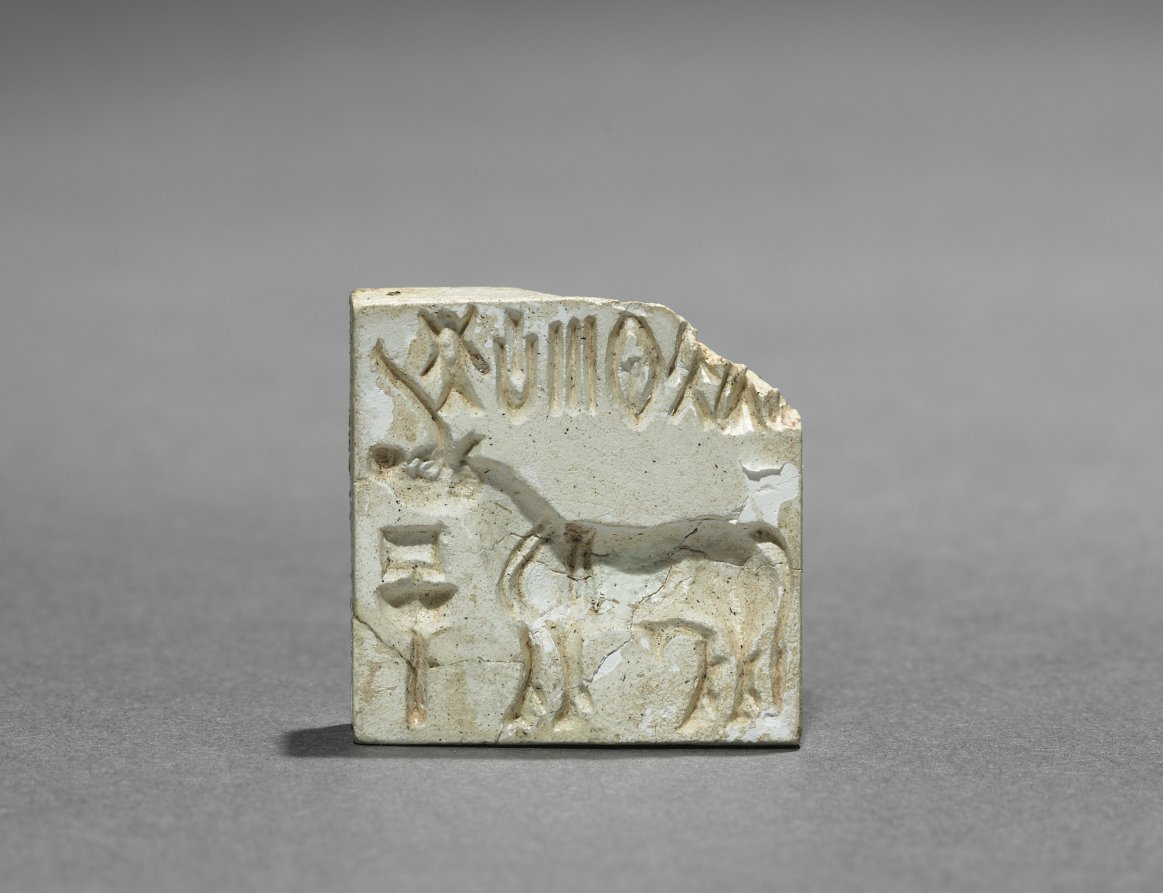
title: Seal with Unicorn and Inscription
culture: Pakistan, Indus Valley civilization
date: c. 2000 BCE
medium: possibly kaolin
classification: Seals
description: Small stone seals, probably used to identify merchandise or property, are among the most numerous objects surviving from the protohistoric urban sites along the banks of the Indus River system. This example has a bovine creature with one horn and one ear showing in profile, his head held over an altar-like object.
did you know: Animals are the most popular motifs in the visual culture of the Indus Valley Civilization, shown much more often than human figures or cityscapes.